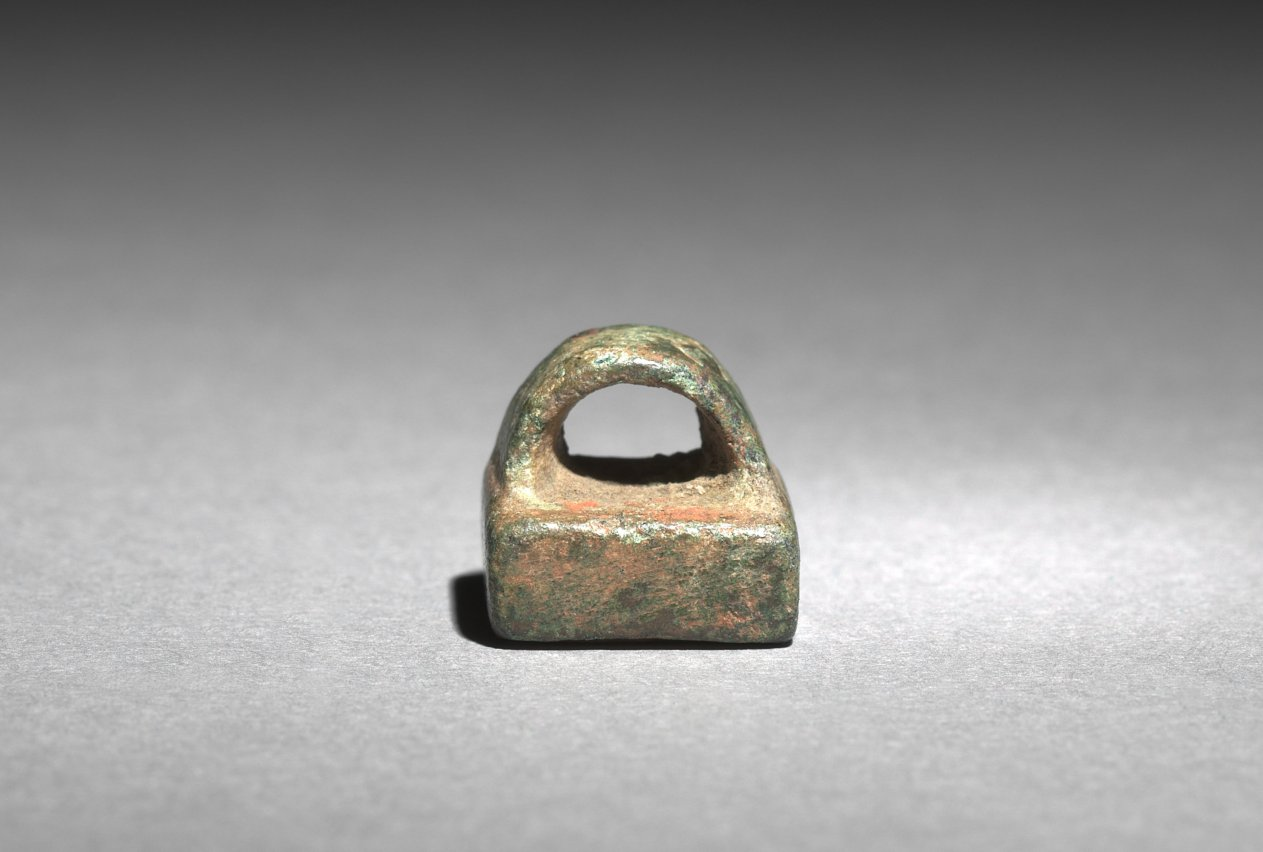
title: Seal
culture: Korea, Goryeo dynasty (918–1392)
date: 1100s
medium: bronze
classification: Metalwork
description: A large quantity of bronze seals were excavated from tombs of the Goryeo dynasty. This seal bears two inscribed characters: 王 (king) and the other illegible. The red cinnabar paste is still visible, indicating it must have been used for signing various documents while its owner was alive.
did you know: A large quantity of bronze seals excavated from tombs of the Goryeo dynasty is closely related to the development of metallurgy in 13th-century Korea that allowed the transition from wood type to movable metal type printing.